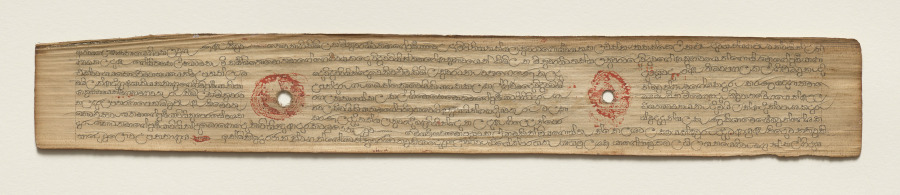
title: Leaf from a Buddhist Manuscript (verso)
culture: Sri Lanka, Singhalese, Late 17th century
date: c. 1700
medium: fiber paper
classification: Manuscript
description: Palm leaf material is still used for manuscripts in Sri Lanka. The palm leaves are prepared first by boiling them, drying them in the sun, and then rubbing them with oils. Scribes then use a metal stylus to incise the text. Then charcoal powder is wiped across the pages, filling in only the inscribed lines.